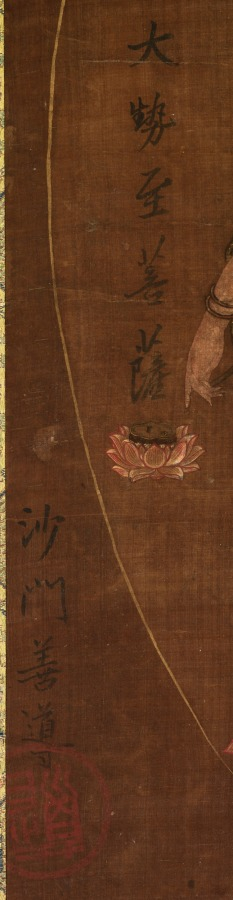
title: Buddha Amitābha with Two Attending Bodhisattvas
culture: China, Southern Song dynasty (1127-1279)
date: 1200s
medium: Hanging scroll; ink and color on silk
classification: Painting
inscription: 南無阿彌陀佛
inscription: 沙門善導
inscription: 觀世音菩薩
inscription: 大勢至菩薩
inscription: 永隆元年十月十五日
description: The supreme deities that rule over the Western Paradise—Amitābha (阿彌陀 in Chinese), Avalokiteśvara (Guanyin 觀音), and Mahāsthāmaprāpta (Dashizhi 大勢至)—are here enclosed within a circle of light. To secure entry into that paradise for Buddhist followers of the Pure Land sect, one must recite the phrase namo amituofo (南無阿彌陀佛, Homage to the Buddha Amitābha). Here the phrase is repeated 10 times in calligraphy above the figures, reinforcing the need for continual recitation.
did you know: Each line of calligraphy, which invokes the Buddha's name, emerges from a lotus blossom.